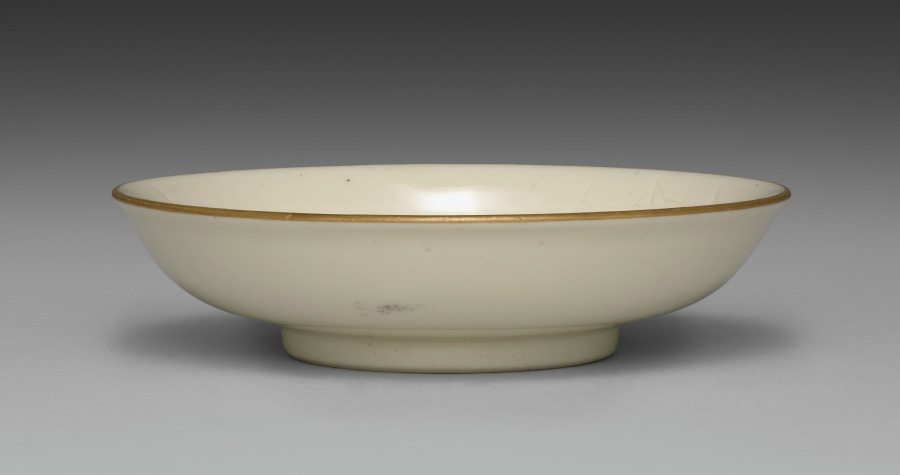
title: Small Dish from Dining Set with Plum Blossoms and Cracked-Ice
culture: Japan, Meiji period (1868–1912)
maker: Seifū Yohei II (Japanese, 1844–1878)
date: c. 1875–78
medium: Porcelain with molded designs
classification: Ceramic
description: Each item in this set has a delicate low-relief design of flowering plum branches over scattered, intersecting lines meant to resemble the cracked-ice surface of a frozen body of water and is signed on the base in gold pigment. While Yohei II produced many fine works in underglaze blue, like those produced by Kiyomizu Shichibei, he also made works in quite different styles later in his career, from the early 1870 s. In 1873, he was appointed purveyor to the Industrial Center of Kyoto Prefecture, a designation associated with Kyoto’s efforts to reach an international market through the port of Kobe; and from 1875 until his death, he was involved in national-level projects to present Japanese ceramics across the world. It was during this period that Yohei III was apprenticed to Yohei II, and it has been suggested that this set may in fact be an early example of Yohei III’s work, which he signed with his teacher’s name. Decorated with flowers resembling Japanese textile motifs, the set calls to mind the design of Yohei II’s pair of vases with plum blossoms in the Victoria and Albert Museum. Here, the elaborate trees created for a formal public exhibition setting have been translated into the approachable blossoms of the genteel domestic environment. While the designs are consistent across the pieces, each raised flower petal and pistil and each incised line in the ice was done by hand, so the cups, bowls, and dishes are similar yet unique. The bottoms of two boxes once identified the set’s owner, but the information has been deliberately obscured with black ink. However, inscriptions still visible appear to indicate two occasions, once at the end of July 1886 , and once again in June 1916 , when parts of the set were requested from Hokura in Niigata Prefecture. The location corresponds to a neighborhood in the present-day city of Jōetsu. The surname Tsuji 辻 also appears on a paper tag affixed to one of the box cloths. Future research may possibly reveal more about their provenance. A vase by Yohei III in a private collection combines the formal grandeur of the Yohei II vases in the Victoria and Albert Museum with the gentler design of this dining set, placing flowering plum trees against soft, scalloped-edge clouds resembling those in golden screens.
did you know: The dining wares have a creamy white coloration that the four boxes containing them identify as Korean in style.